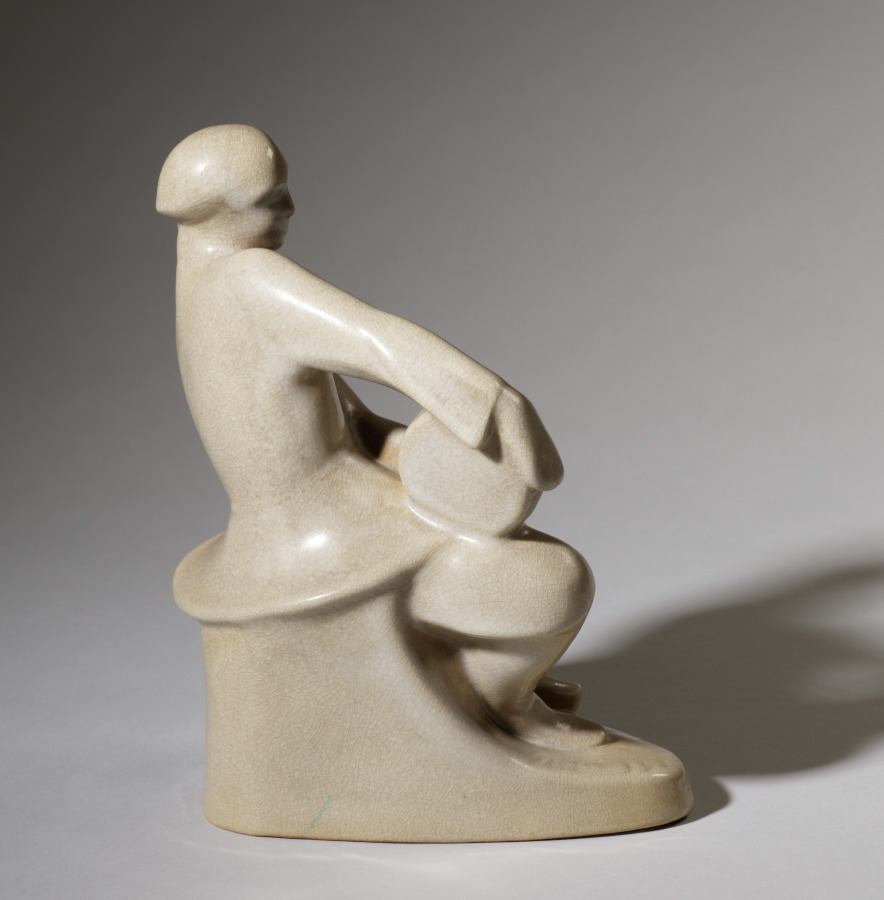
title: Tambourine Player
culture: America, Ohio, Cleveland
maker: Cowan Pottery Studio (America, Rocky River, Ohio, 1920–1931)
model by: Alexander Blazys (American, born Russian Empire [now Lithuania], 1894–1963)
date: 1927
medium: mold-made ceramic, glazed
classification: Ceramic